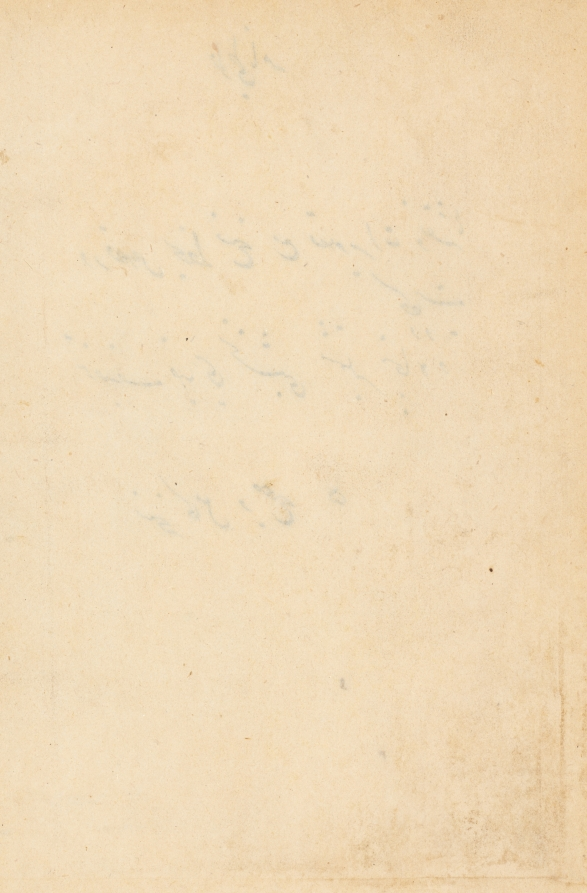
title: Tuti-Nama (Tales of a Parrot)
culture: Mughal India, court of Akbar (reigned 1556–1605)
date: c. 1560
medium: gum tempera, ink, and gold on paper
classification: Painting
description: The Tuti-Nama, written in Persian in the early fourteenth century, contains a series of fifty-two moralizing tales told by a clever, talking parrot. Each story is intended to instruct Khujasta and distract her from an adulterous affair. The Cleveland Museum of Art’s copy of the manuscript was painted for Emperor Akbar (r. 1556–1605) and represents the origins of Mughal painting.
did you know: Another Akbari Tuti-Nama, painted in the 1580s, is held in Dublin’s Chester Beatty Library.